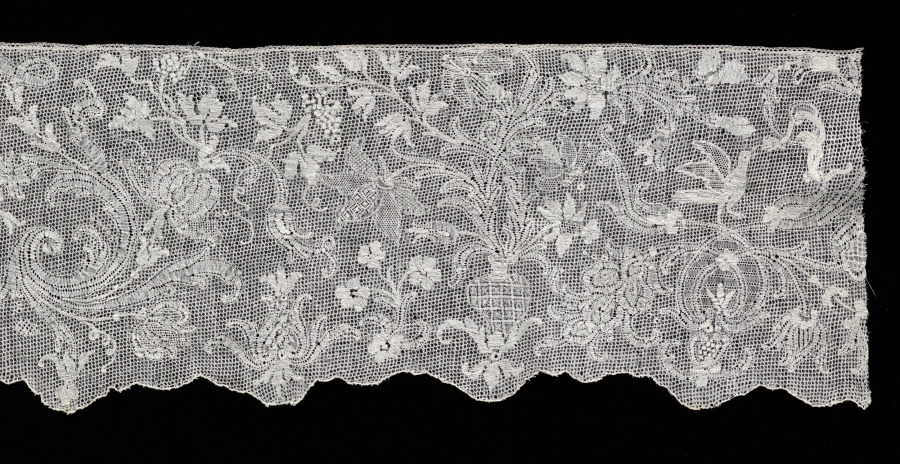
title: Lace Flounce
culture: Belgium, Dinant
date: 1700s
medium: Linen: needle lace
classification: Lace